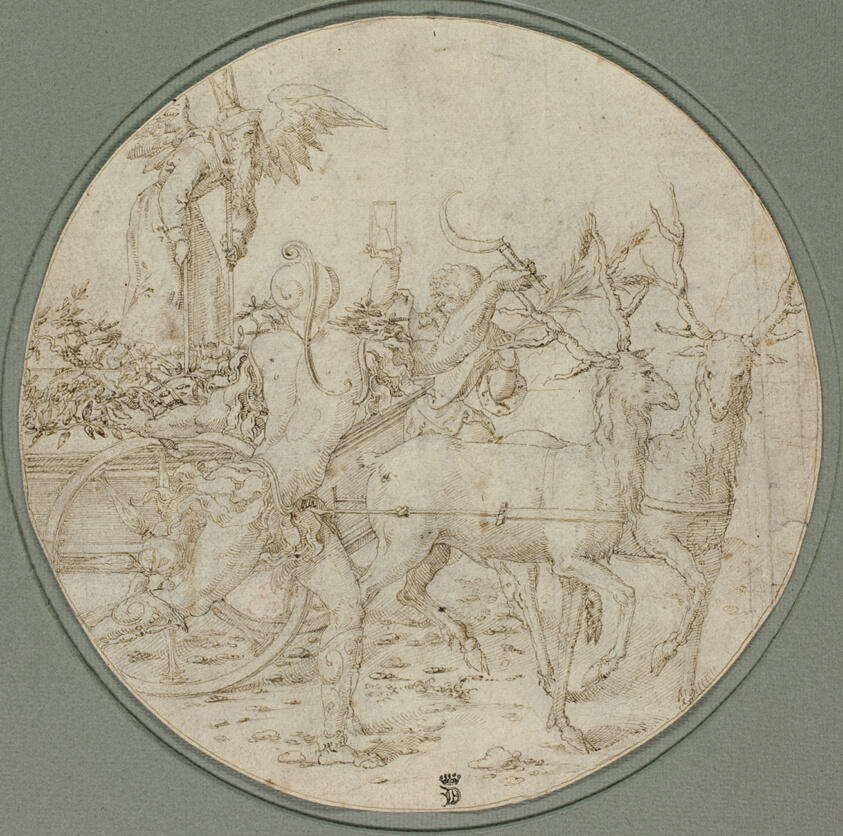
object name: Drawing and Watercolor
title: The Triumph of Time (recto); Sketch of a Stag (verso)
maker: Style of Dirk Vellert (Netherlandish, active 1511-1544)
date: c. 1517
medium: Pen and brown ink, over traces of black chalk, on cream laid paper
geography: Netherlands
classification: pen and ink drawings; drawings (visual works); prints and drawing